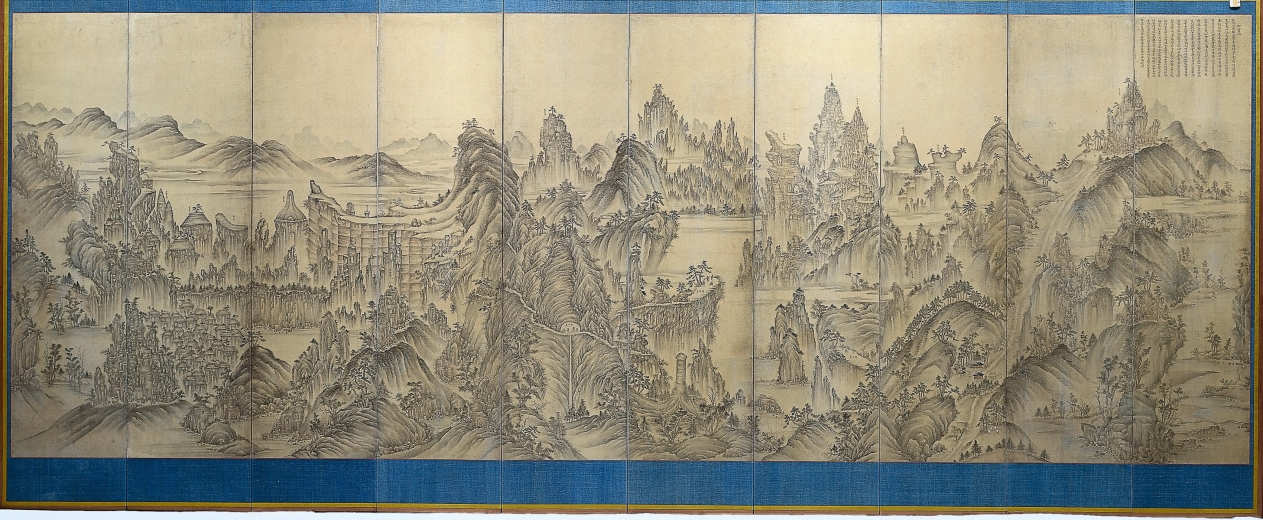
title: Seven Jeweled Mountain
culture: Korea, Joseon dynasty (1392–1910)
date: late 1800s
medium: ten-panel screen; ink and color on silk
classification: Painting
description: With a bird’s-eye view, this ten-panel folding screen portrays the famous Seven Jeweled Mountain 칠보산 in North Korea. Ancient volcanic eruptions shaped the mountain’s unique and awe-inspiring terrain such as phallic-shaped pillars (panel #5, from the right); a large flat-topped, steep-sided cliff (panels #7 and #8), and a rugged mountain composed of metamorphic and igneous rocks (panels #9 and #10). The tradition of landscape painting that details actual natural sites and captures their topographic features in Korea began in the 1700s and continued onward. While such natural wonders were beloved as popular destinations for tourism and pilgrimage, after the Korean War (1950–53), these sites in North Korea are no longer accessible to the outside world. This folding screen detailing the mountain’s distinctive topography feeds our imagination and longing for such an unattainable place.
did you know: Featuring a spectacular panoramic view and topographical details, this ten-panel folding screen is an excellent 19th-century version of the Korean “true-view” landscape painting tradition.